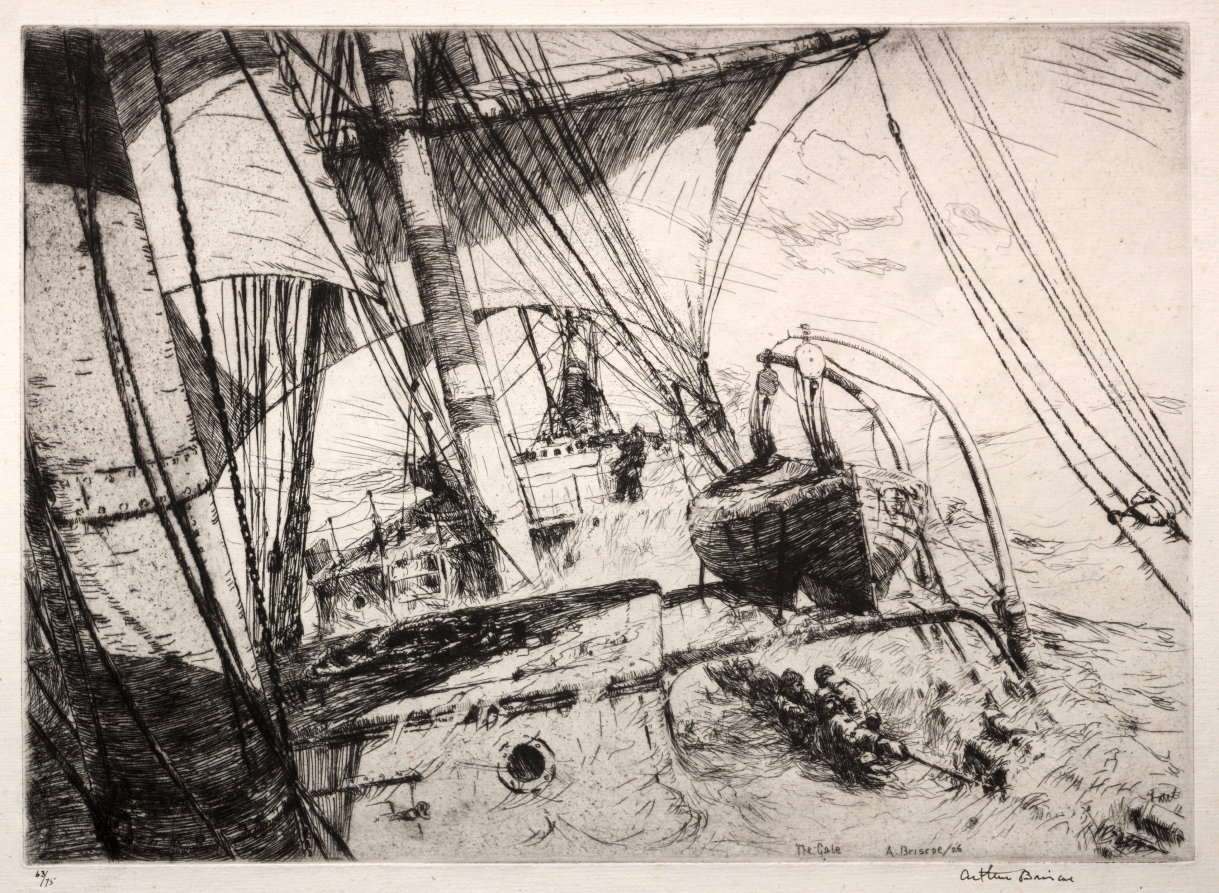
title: The Gale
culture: England, 20th century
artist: Arthur John Trevor Briscoe (British, 1873–1943)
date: 1926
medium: etching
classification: Print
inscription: Lower margin, in ink: 63/75 Arthur Briscoe